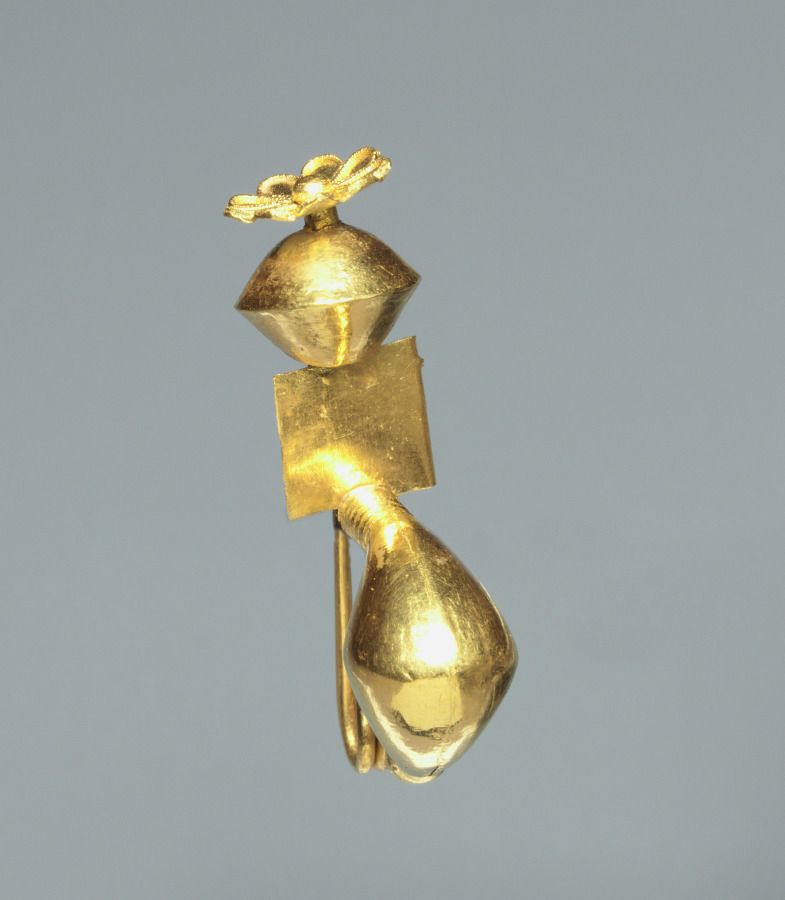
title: Fibula (Pin)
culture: Etruscan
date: 300s BCE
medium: gold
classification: Jewelry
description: This gold fibula consists of a leech-shaped bow attached to a pin, a plaque, and a biconical bead. A nine-petaled flower tops the bead. The fibula was likely used to fasten clothes by gathering fabric together. Unlike silver and bronze, gold does not easily tarnish.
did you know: This fibula was cast in three parts, the bow and pin, plaque, and bead, using the lost wax method.